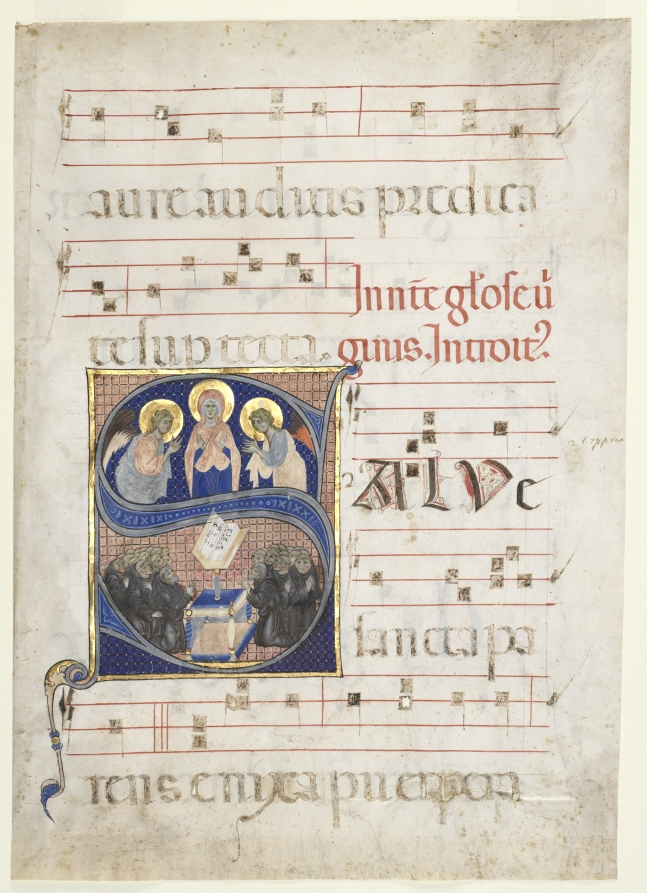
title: Initial S[alve sancta parens] with the Virgin Adored by Angels, and Singing Benedictine Monks: Single Leaf from a Gradual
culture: South Italy, 13th century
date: c. 1270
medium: ink, tempera, and gold on parchment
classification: Manuscript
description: This large initial S introduces the introit (beginning) for a Saturday Votive Mass of the Virgin Mary. The text begins Salve sancta parens (Hail Holy Parent [Mother]). The double curve of the letter creates two registers for the representation of independent scenes. The initial is set within a rectangular frame and against a background of diapers (geometric patterns). This diapering motif was commonly used in French illumination of this period and thus reveals some French influence in the decoration of the letter. Additionally, Byzantine models were probably used by the artist for the figures of the Virgin flanked by two angels—perhaps inspired by a mosaic.